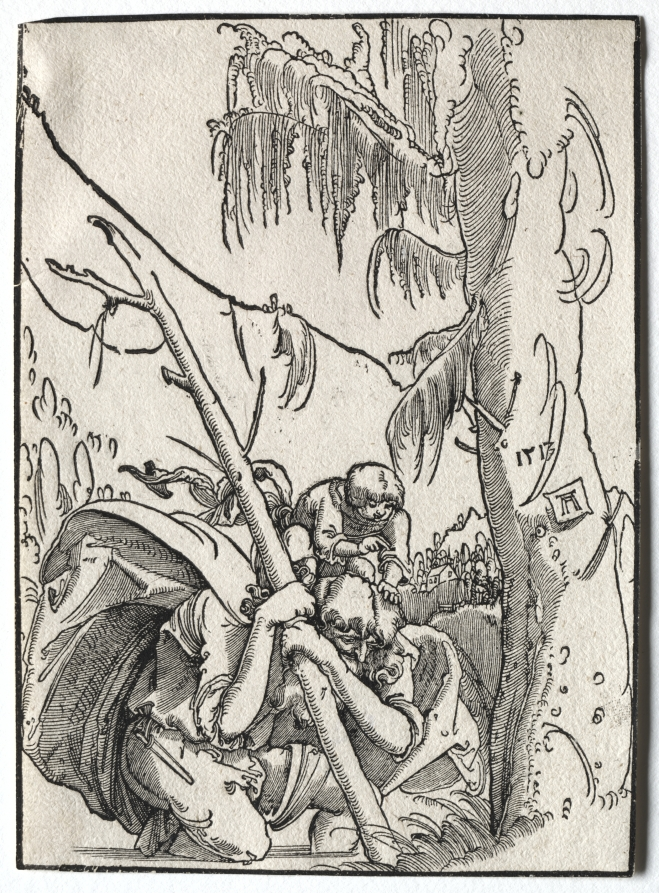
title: St. Christopher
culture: Germany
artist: Albrecht Altdorfer (German, c. 1480–1538)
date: 1513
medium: woodcut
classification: Print